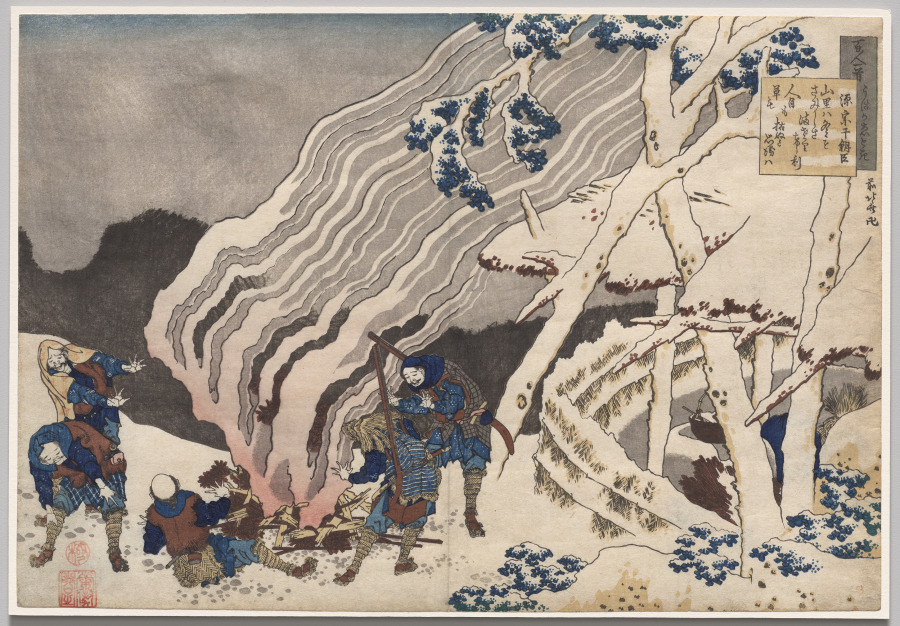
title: Poem by Minamoto no Muneyuki from the series One Hundred Poems by One Hundred Poets Explained by the Nurse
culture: Japan, Edo period (1615–1868)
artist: Katsushika Hokusai (Japanese, 1760–1849)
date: 1835–36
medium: Color woodblock print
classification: Print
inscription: Signature: Zen Hokusai Manji. Publisher: Iseya Sanjiro (Eijudo). Censorship Seal: kiwame.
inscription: In the mountain village,/ it is in winter that my loneliness/ increases most,/ when I think of how both have dried up,/ the grasses and people’s visits. —Translation by Joshua Mostow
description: Katsushika Hokusai designed this print series from the perspective of a confused nurse attempting to illustrate classical poetry but missing the subtle allusions. This interpretation creates what would have been considered a comical disconnect between poem and image. The poem on this print reads as follows: In the mountain village, it is in winter that my loneliness increases most, when I think of how both have dried up, the grasses and people’s visits. —Translation by Joshua Mostow While nobleman Minamoto no Muneyuki (died 939) wrote of dying grasses, the nurse imagines instead a lively scene of hunters warming themselves around a fire.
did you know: This impression of Hokusai's print has a fold along its center, indicating that it may have once been placed in an album of the book format.